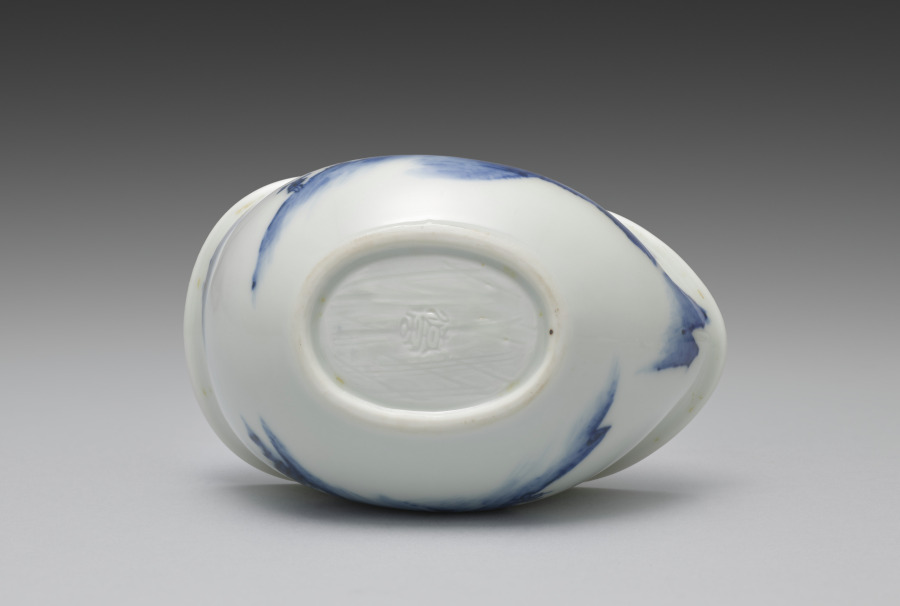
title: Water Cooler from Tea Set with Chinese Landscape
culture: Japan, Meiji period (1868–1912)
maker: Seifū Yohei III (Japanese, 1851–1914)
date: 1893–1914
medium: Porcelain with underglaze blue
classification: Ceramic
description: The kidney-shaped water cooler, yuzamashi, has a scene of a man gazing at a full moon in a dramatic mountain-scape stretching before a large compound in the woods. Another man, hunched over and carrying a heavy parcel tied to a pole over his shoulder, struggles to make his way up a hill to the site. The cooler also has a pair of applied nyoi staff-head forms for resting the tips of one’s thumb and index finger.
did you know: This is a yuzamashi, a container used to cool boiled water to just the right temperature for the best flavor when steeping.